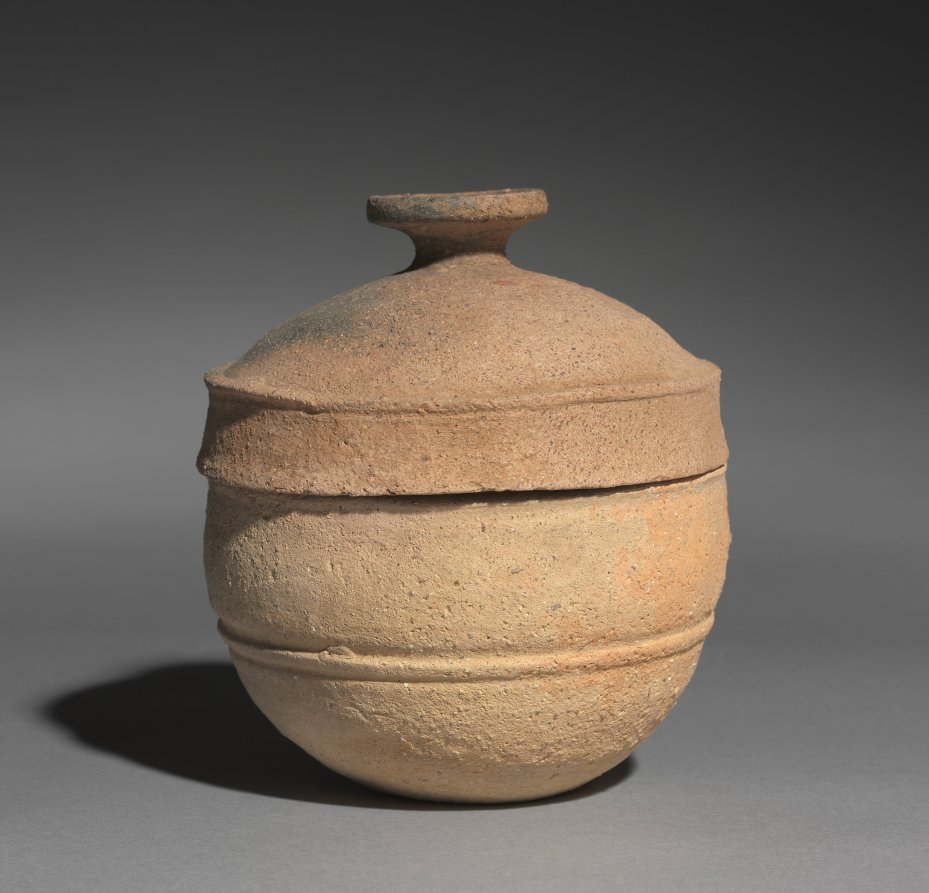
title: Lidded Jar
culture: Korea, Silla (57 BC-935) or Kaya (AD 42-562) period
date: 400s–500s CE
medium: red earthenware with incised band designs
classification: Ceramic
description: Early earthenware from the Three Kingdoms period (57 BCE–668) became widely utilized as agriculture and religion grew to be essential elements in sustaining society and its systems. The clay jars of different sizes and shapes on display were made for the following purposes: some were used to store harvested grains and seeds, some, especially lidded ones such as this, to preserve cremated remains, and some to serve offerings in rituals.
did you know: Closed kilns built on hillsides became widely used for producing this type of pottery vessel in Korea during the Three Kingdoms period.